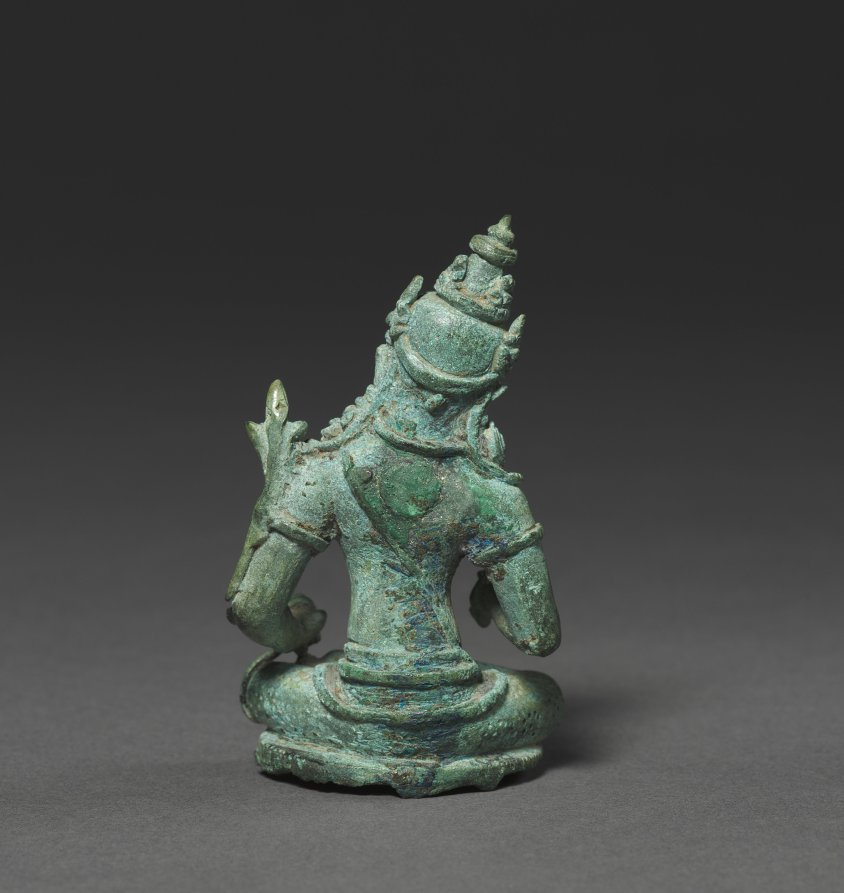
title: Bodhisattva Padmapani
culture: Java, predating Nganjuk style, 10th century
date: 900s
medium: bronze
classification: Sculpture